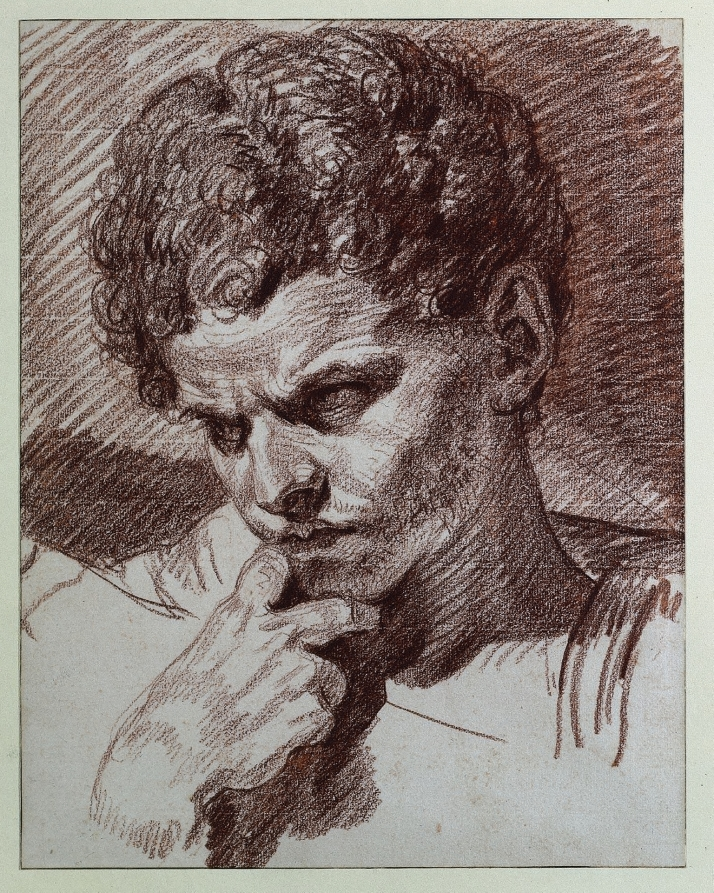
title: Head of Caracalla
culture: France, 18th century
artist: Jean-Baptiste Greuze (French, 1725–1805)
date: c. 1768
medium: Red chalk on cream laid paper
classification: Drawing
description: As part of their training in the late 18th century, French artists practiced drawing têtes d'expression, or expressive heads, that display subtleties of human emotion. Greuze made this chalk study in preparation for a painting in which the Roman emperor Septimius Severus rebukes his notoriously ruthless son, Caracalla, for attempting to assassinate him. Although Greuze based this face for the figure of Caracalla on a Roman portrait bust, he imaginatively adapted the facial expression to dramatize Caracalla’s resentment and humiliation during the confrontation.